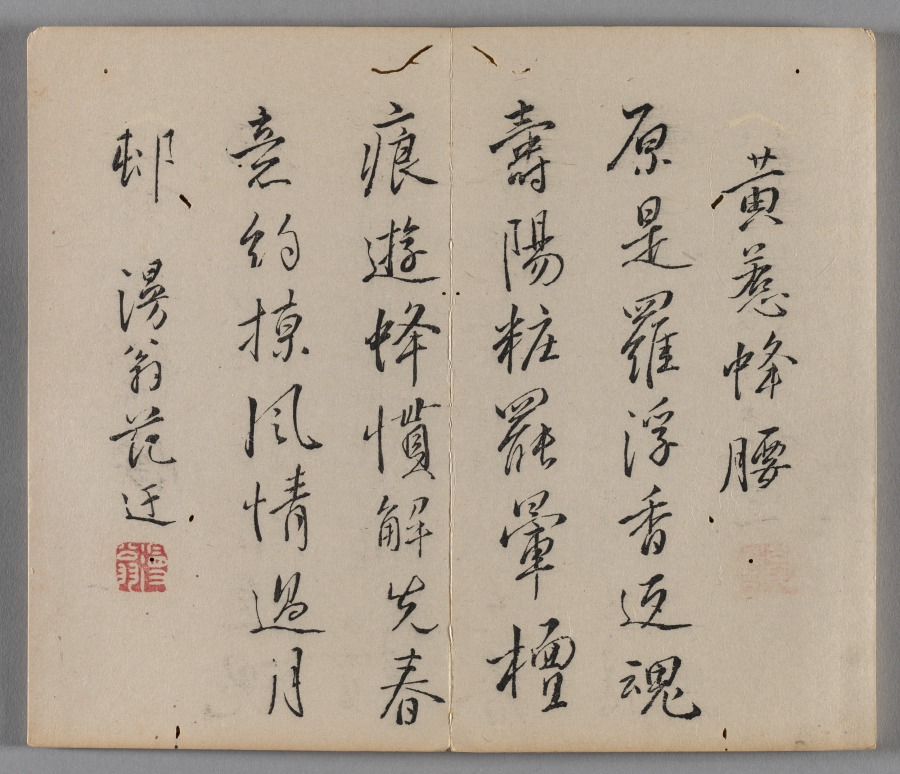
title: Ten Bamboo Studio Painting and Calligraphy Handbook (Shizhuzhai shuhua pu): Plum Blossoms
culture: China, Qing dynasty (1644-1911)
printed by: Hu Zhengyan (Chinese, c. 1584–1674)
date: 1633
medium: Woodblock-printed book; ink and colors on paper; first edition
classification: Print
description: Color printing reached a level of perfection in the early 1600s, as seen in this Ten Bamboo Studio Collection of Calligraphy and Painting and the Mustard Seed Garden Manual of Painting (printed 1679 and 1701). The painterly quality, precision in registering (aligning) the woodblocks, and harmonious colors made them the most successful color print editions in Chinese history. Both editions were printed and compiled in Nanjing, spread nationwide, and had a great impact on the arts in Japan and Korea.